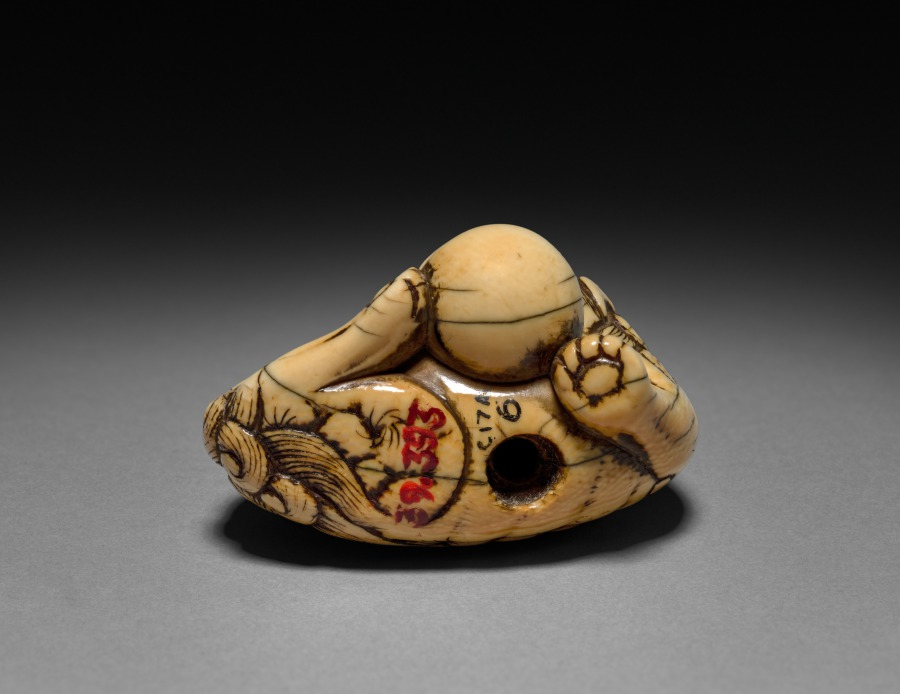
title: Chinese Lion with Ball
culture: Japan, Meiji period (1868–1912)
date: early 1900s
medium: ivory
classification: Netsuke